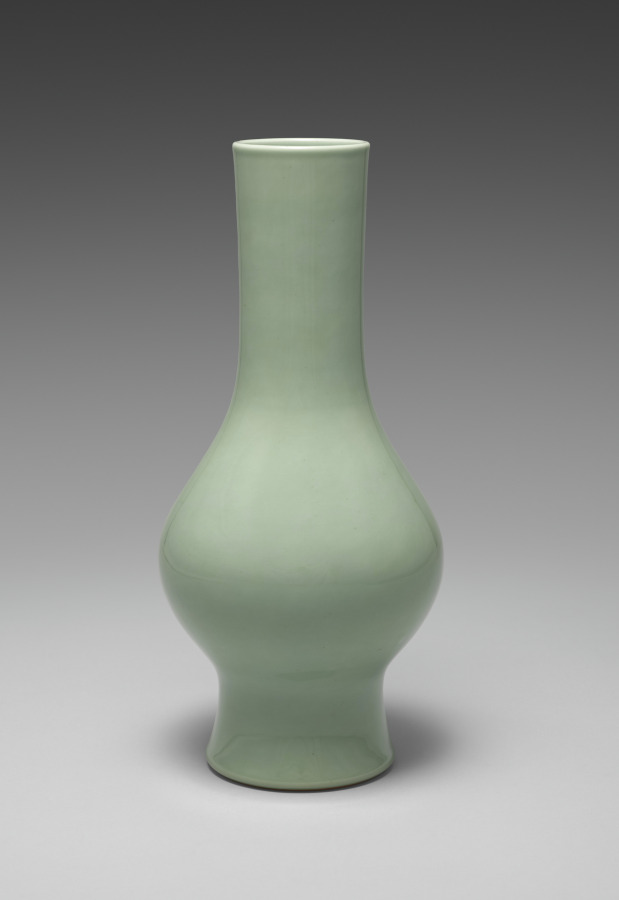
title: Flower Vase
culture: Japan, Meiji period (1868–1912)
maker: Seifū Yohei III (Japanese, 1851–1914)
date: 1912–14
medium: Porecelain with green glaze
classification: Ceramic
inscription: The vase's box lid identifies the vase as hisokuyō (C. mise yao 秘色窯), or “mysterious color ware,” style.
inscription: 清風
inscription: 清風制之 【印】帝室技芸員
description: This flower vase has a tall, slightly flared foot and bulbous body with a slimmer neck. It is completely undecorated but for the hisoku, or “mysterious color,” glaze. Its box lid has a red seal with a flower on it, a rather unusual feature also seen on the box for the green-glazed water container that belonged to the Hosokawa family (see CMA 2022.197).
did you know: The vase's box lid identifies the glaze as hisoku 秘色 or “mysterious color.”